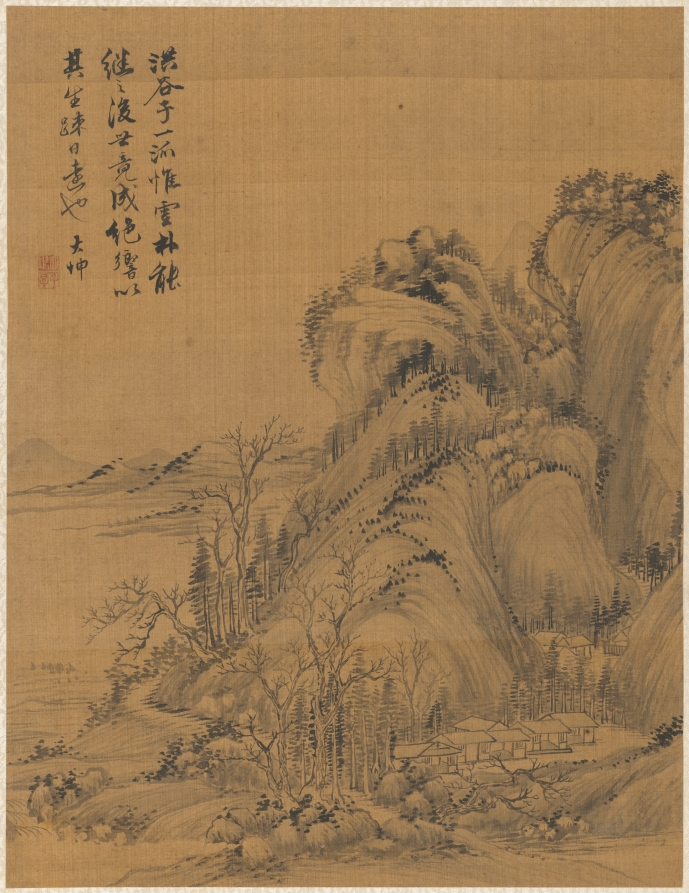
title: Landscape in the Style of Ching Hao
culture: China, Qing dynasty (1644-1911)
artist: Zhai Dakun (Chinese, d. 1804)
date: 1775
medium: album leaf; ink and color on silk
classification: Painting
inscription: Dwellings Beneath Folded Hills. Of the entire school of Hongguzi (Jing Hao; tenth century), only Yunlin (Ni Zan; 1301-1374) succeeded in continuing (his methods). Later generations endlessly achieved only echoes, and I consider that their strange (methods) daily become more distant (from their source). Dakun. Seals: 1) r/i "Dakun" 2) r/r "Zihou"